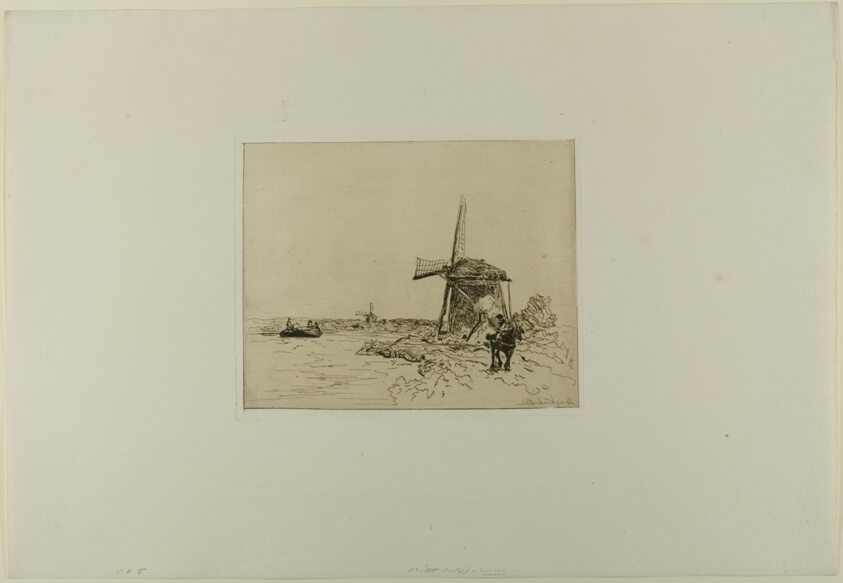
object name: Print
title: The Towpath, from Cahier de six eaux-fortes, vues de Hollande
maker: Johan Barthold Jongkind (Dutch, 1819-1891)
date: 1862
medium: Etching in brownish-black on ivory laid paper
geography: Netherlands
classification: etching; paper; print; prints and drawing